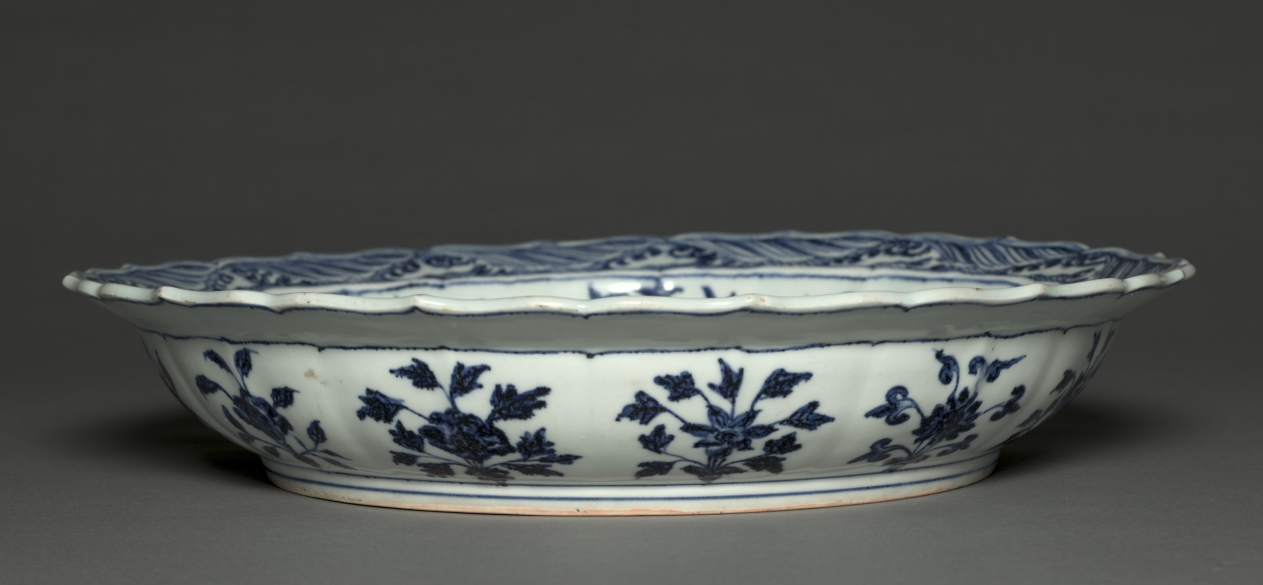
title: Plate with Grapes and Floral Sprays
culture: China, Jiangxi province, Jingdezhen, Ming dynasty (1368-1644), Yongle period (1403-24)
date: 1403–24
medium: porcelain with underglaze blue decoration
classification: Ceramic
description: This large platter with grape and floral decoration, which is different from small stem cups decorated with dragons, CMA 1957.60 and CMA 1964.168, was made primarily for export to southeastern and western Asia. However, a similar example bearing the Xuande reign mark has also been excavated from the Ming imperial kilns at Jingdezhen.